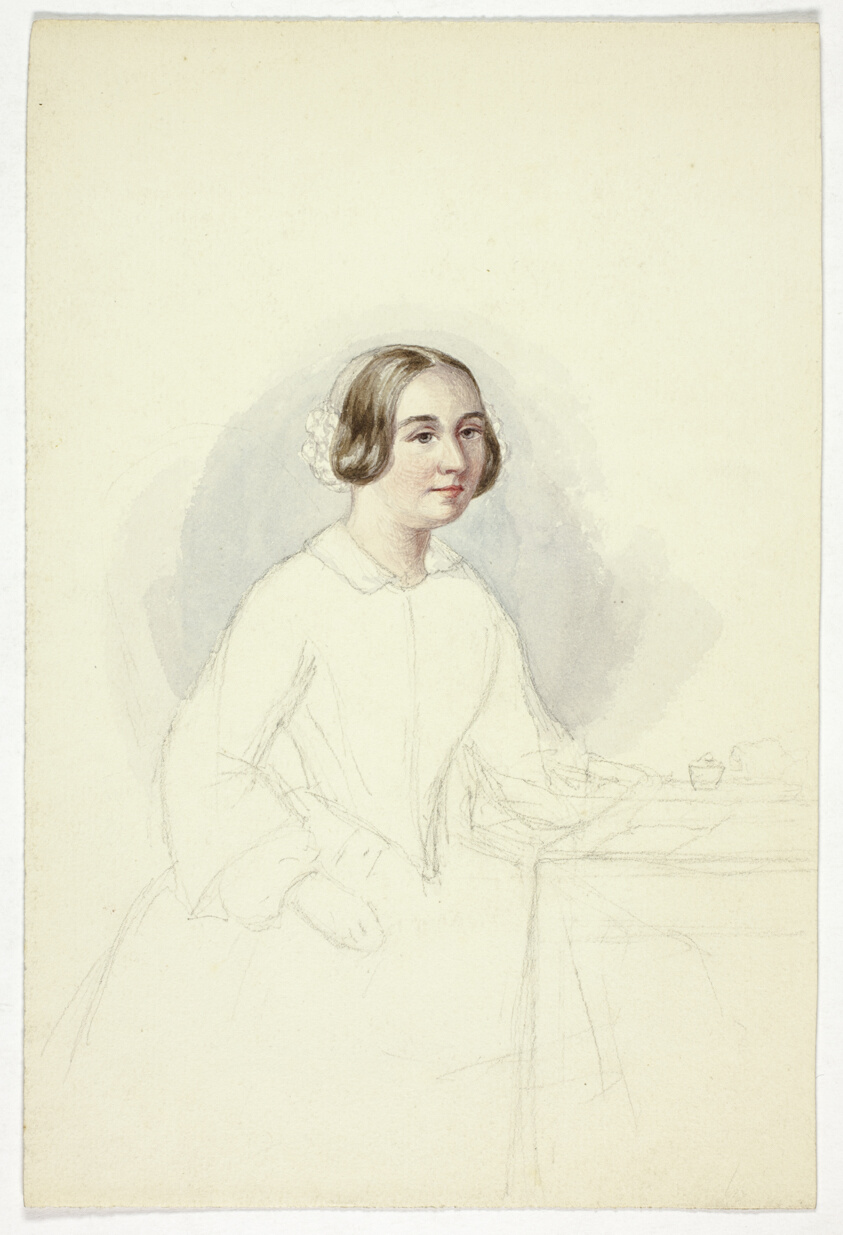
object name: Drawing and Watercolor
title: Young Woman at Writing Desk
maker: Elizabeth Murray (English, c. 1815-1882)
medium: Watercolor over graphite on cream wove paper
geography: England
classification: watercolor; drawings (visual works); prints and drawing